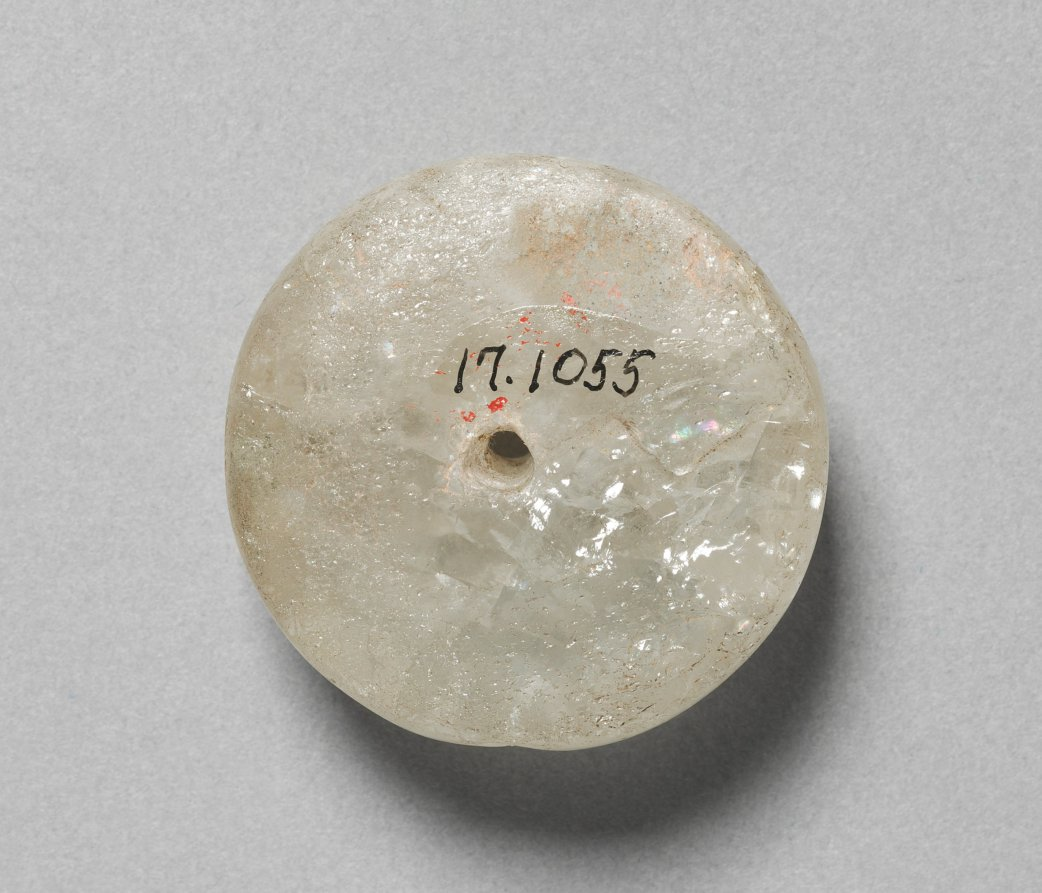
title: Bead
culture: Korea, Unified Silla period (676-935)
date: 700s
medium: glass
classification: Jewelry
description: An enormous amount of beaded strings and necklaces were excavated from Silla tomb sites. Glass, largely produced in ancient Rome since the late first century CE, also reached the Korean peninsula via the Silk Road, the ancient global trade route. Yet this glass bead is highly likely to be soda glass produced in the Silla territory.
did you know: Glass, largely produced in ancient Rome since the late first century CE, reached the Korean peninsula via the Silk Road, the ancient global trade route. This glass bead is very likely to be a local product inspired by the imported Roman glass products.